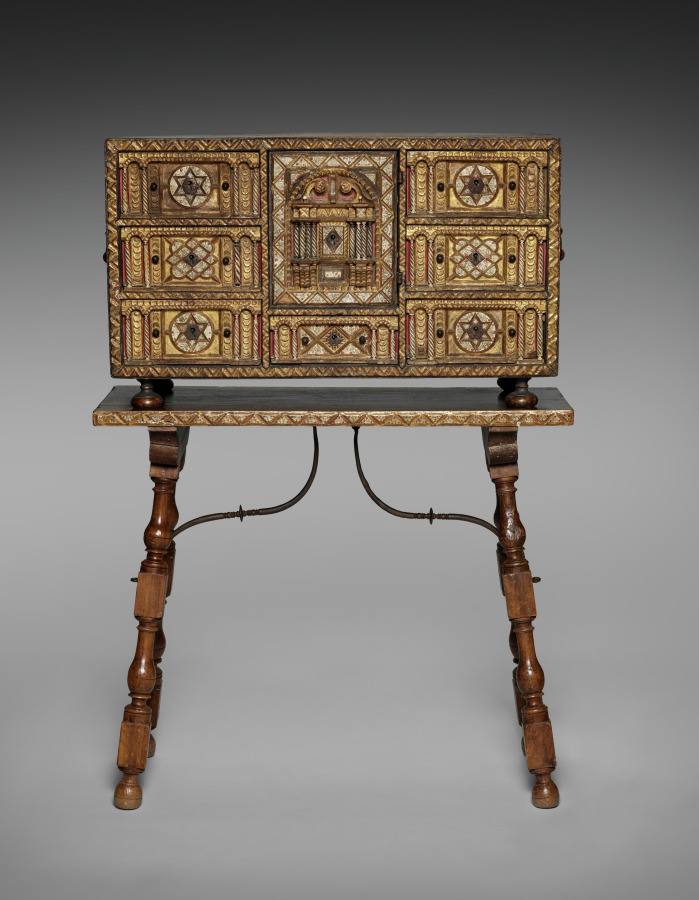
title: Chest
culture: Spain, Colonial, late 17th Century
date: late 1600s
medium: turned and joined wood, gilded and painted red with applied bone columns and bone inlays, wrought iron hardward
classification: Furniture and woodwork